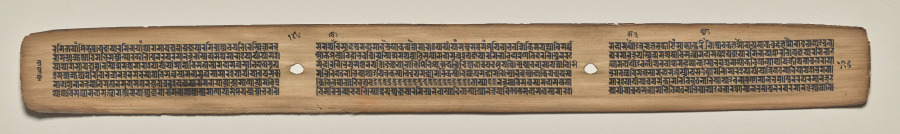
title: Text, Folio 146 (verso), from a Manuscript of the Perfection of Wisdom in Eight Thousand Lines (Ashtasahasrika Prajnaparamita-sutra)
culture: Eastern India, Bihar, Vikramashila Monastery. Painting: Nepal, Kathmandu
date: Sunday, September 14, 1119 (year 239 of the Newar Samvat in the month of Ashvina)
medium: gum tempera and ink on palm leaves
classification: Painting